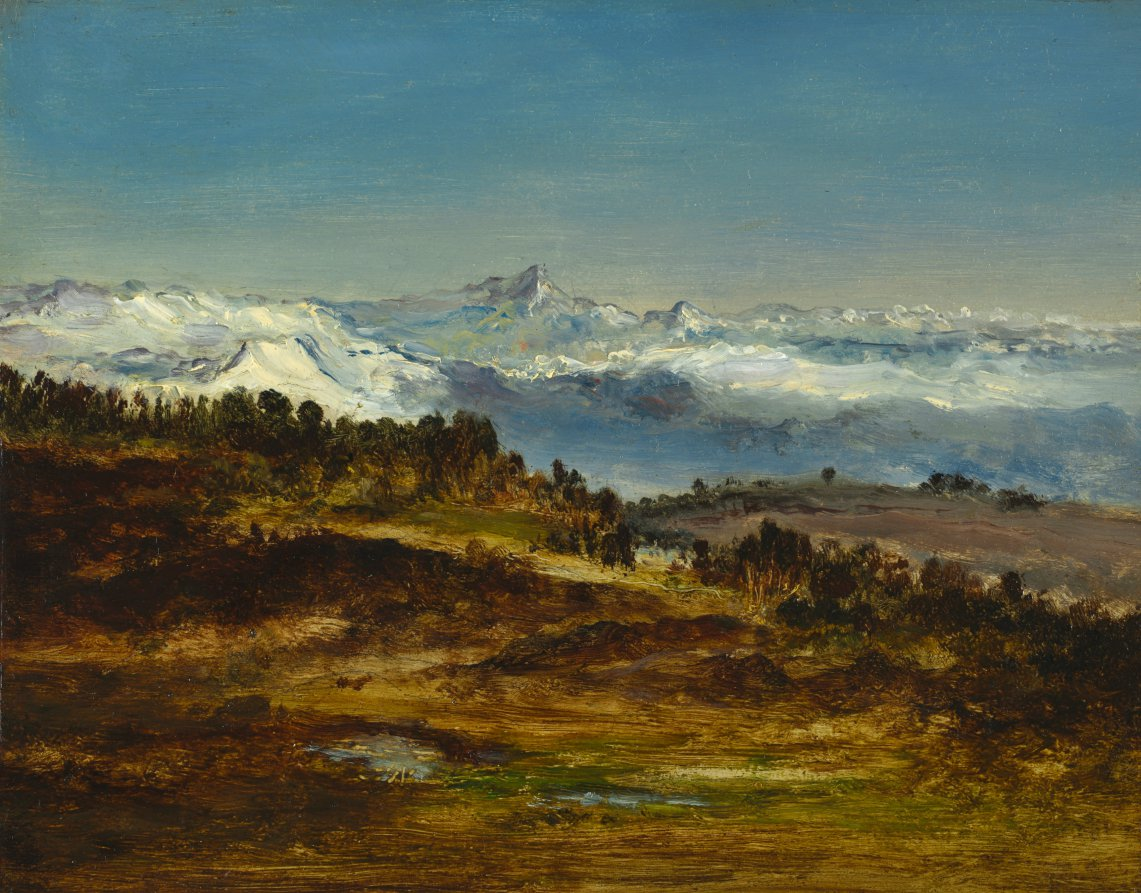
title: The Pyrenees, the Peak of the Midi de Bigorre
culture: France, 19th century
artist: Narcisse Diaz de la Peña (French, 1807–1876)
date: 1871–1872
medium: oil on wood panel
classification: Painting